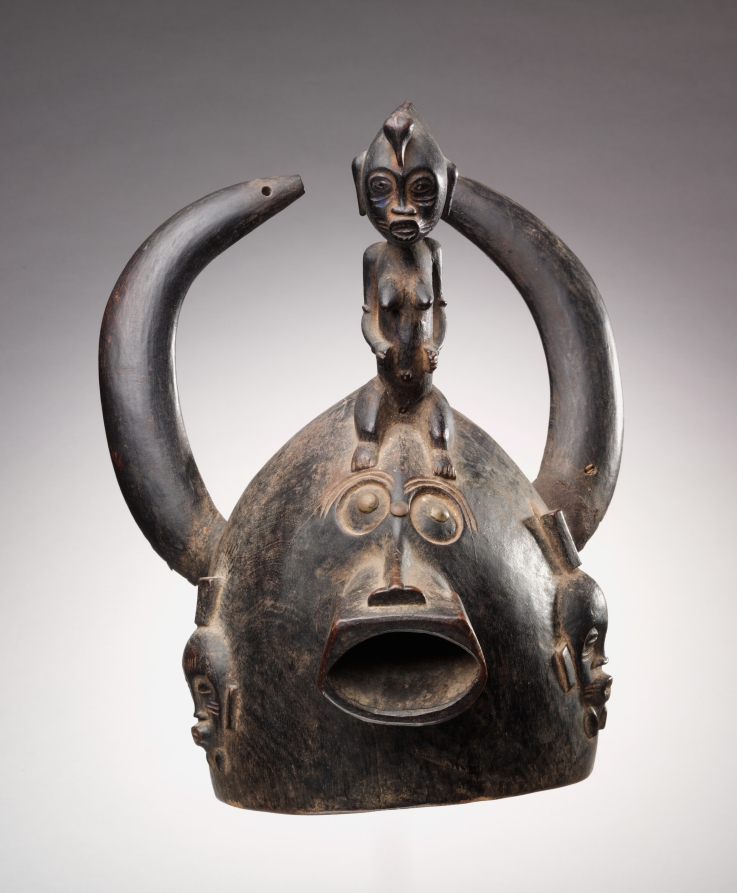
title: Helmet Mask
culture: Africa, West Africa, Côte d'Ivoire, Senufo-style carver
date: early to mid-1900s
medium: Wood, upholstery studs, and colorant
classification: Mask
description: This type of helmet was worn in rituals demonstrating a boy’s transition from one age group to the next, prior to his actual initiation into the secret Poro society. The pre-initiates were viewed as unknowing and anxious oxen, so the horns on such helmets may refer to those of horned cattle. The female figure alludes to women’s supernatural powers, which assure the welfare of Poro members.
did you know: Cowrie shells, feathers, and other accessories once decorated this helmet.